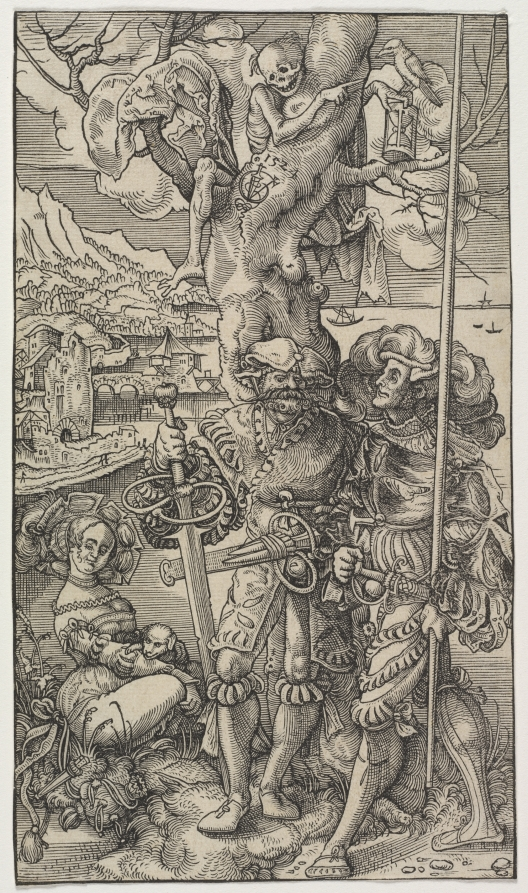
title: Mercenaries and a Woman with Death in a Tree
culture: Switzerland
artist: Urs Graf the Elder (Swiss, c. 1485–1527/29)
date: 1524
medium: woodcut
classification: Print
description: Two Swiss mercenaries and a woman meet outside a city at a prominent tree. The woman’s immodest dress, glance, and proximity to a money bag imply that she is sexually available, as does the soldier’s suggestively placed sword. Death makes an appearance as a skeleton, conjoining sin with death (for it was believed that overindulgence in carnal love led to peril). The Swiss Confederacy during the 1500s was a culture of mercenary warfare. Women traveled with regiments of soldiers, earning meager wages as servants, cooks, or sex workers. Urs Graf, a soldier himself, made many images ridiculing the situation.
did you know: Urs Graf was a Swiss professional soldier, or mercenary, who made many images of soldiers and camp followers, such as the woman featured here.